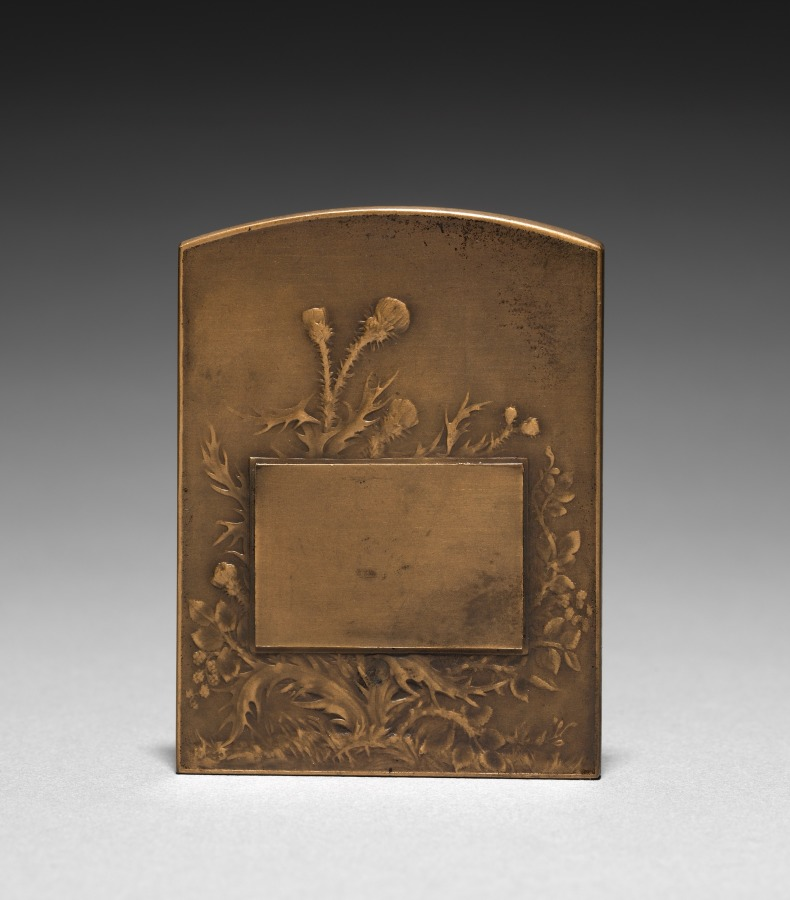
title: Medallion (reverse)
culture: France, 19th century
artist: Marie Alexandre Lucien Coudray (French, 1864–1932)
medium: bronze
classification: Metalwork